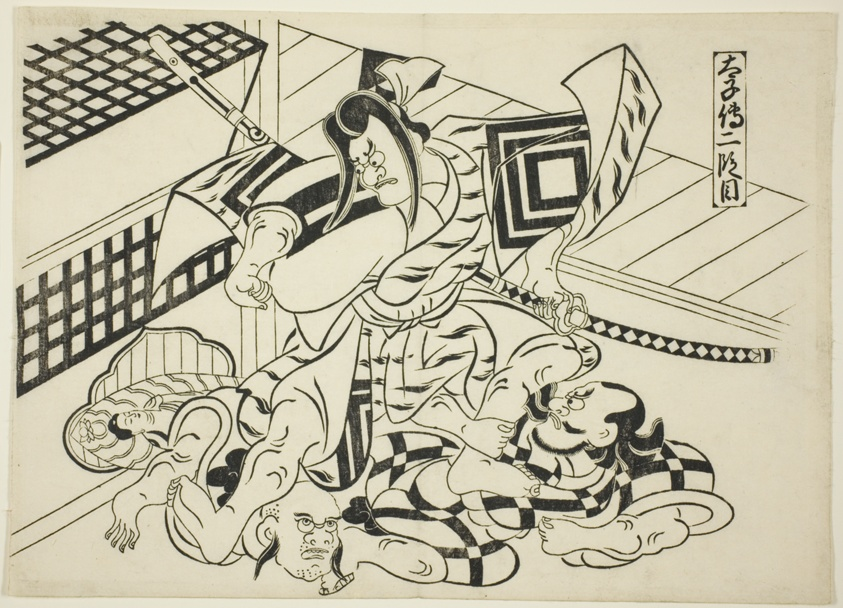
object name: Print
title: Legend of Taishi, Scene 2 (Taishiden nidanme), from the series "Famous Scenes from Japanese Puppet Plays (Yamato irotake)"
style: Japanese (culture or style)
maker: Okumura Masanobu (Japanese, 1686-1764)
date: c. 1705/06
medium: Woodblock print; oban, sumizuri-e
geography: Japan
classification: woodblock print; print; asian art; woodblock